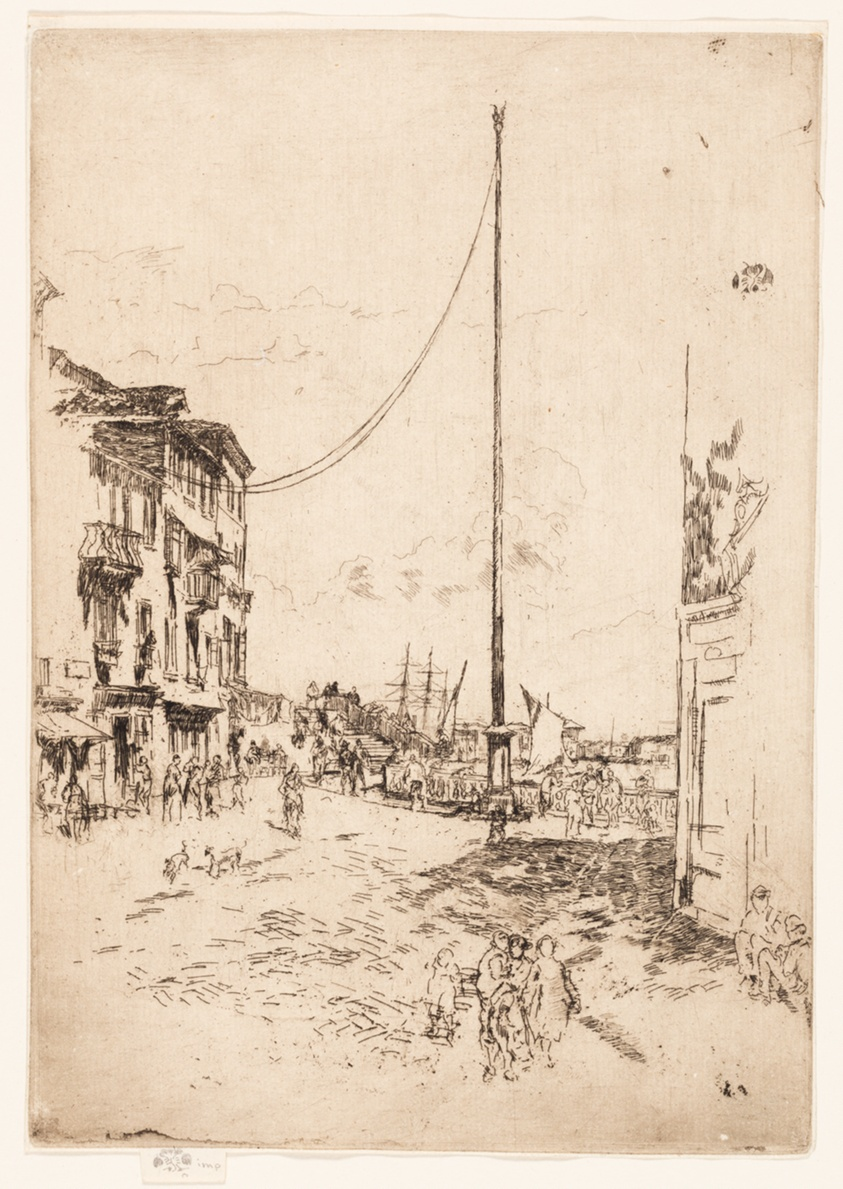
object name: Print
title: The Little Mast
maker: James McNeill Whistler (American, 1834-1903)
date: 1879/80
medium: Etching and drypoint with foul biting in black ink on ivory laid paper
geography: United States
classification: etching; drypoint; foul biting; print; prints and drawing; paper